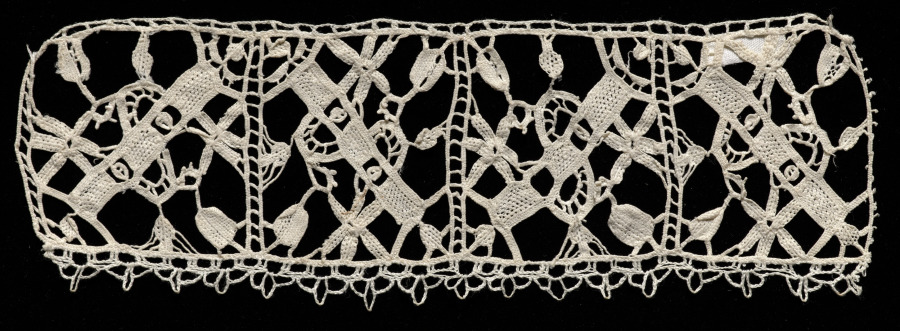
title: Lace Band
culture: Italy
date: 1500s–1600s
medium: Needle lace (p[unto in aria) with modern crochet edging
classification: Lace